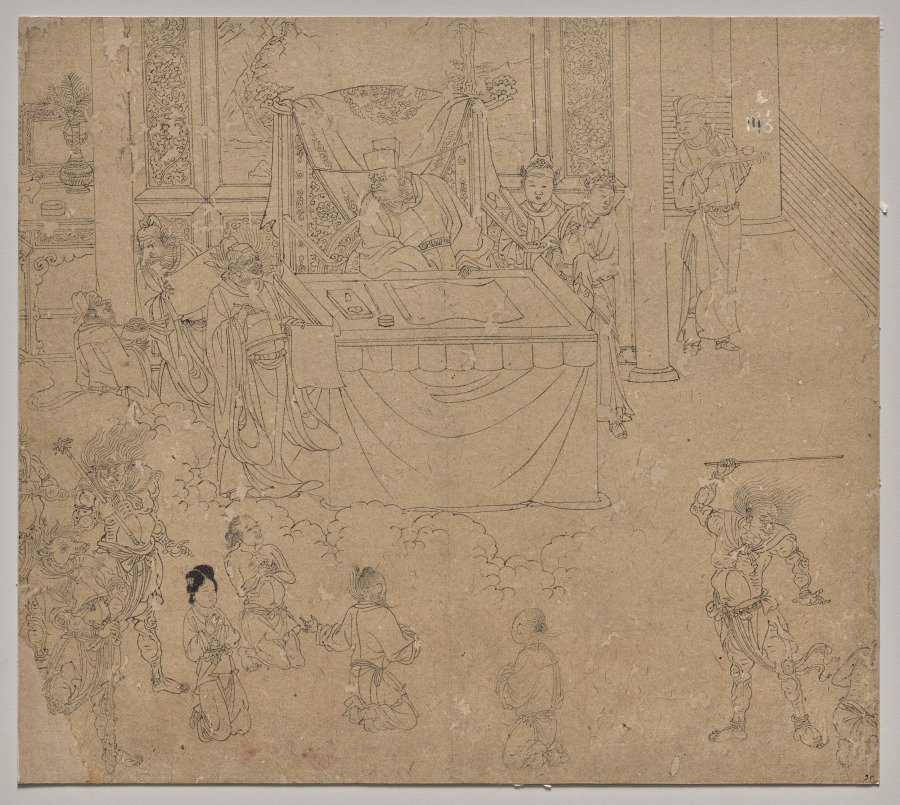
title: Album of Daoist and Buddhist Themes: Kings of Hells: Leaf 35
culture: China, Southern Song dynasty (1127-1279)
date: 1200s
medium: Album, ink on paper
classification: Painting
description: This ink line drawing belongs to a set of leafs illustrating the Ten Kings of Hell. The king here seems to render a verdict on four deceased souls: the plaintiffs are an old couple kneeling in the middle and facing the king, the accused are the younger couple to their left. The man of the latter group bares his upper body. The illustration belongs to a series of 50 ink line drawings that probably served professional artists in workshops as models for mural and silk paintings, commissioned by temples and monasteries.